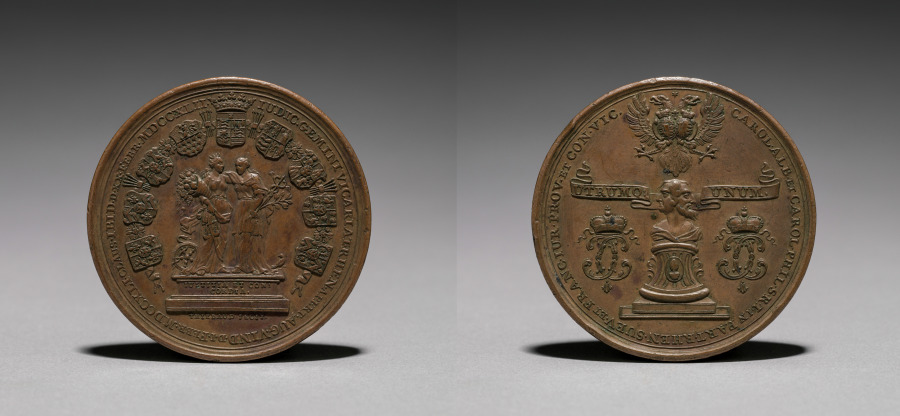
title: Augsburg Medal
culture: France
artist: Thiebaud (French)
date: 1742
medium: bronze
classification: Metalwork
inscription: Carol Alb. et Carol Phil. S.R.L. in Part. Rhen. Suev. et Franc. iur. Prov. et. con. Vic. Utrumq. unum.